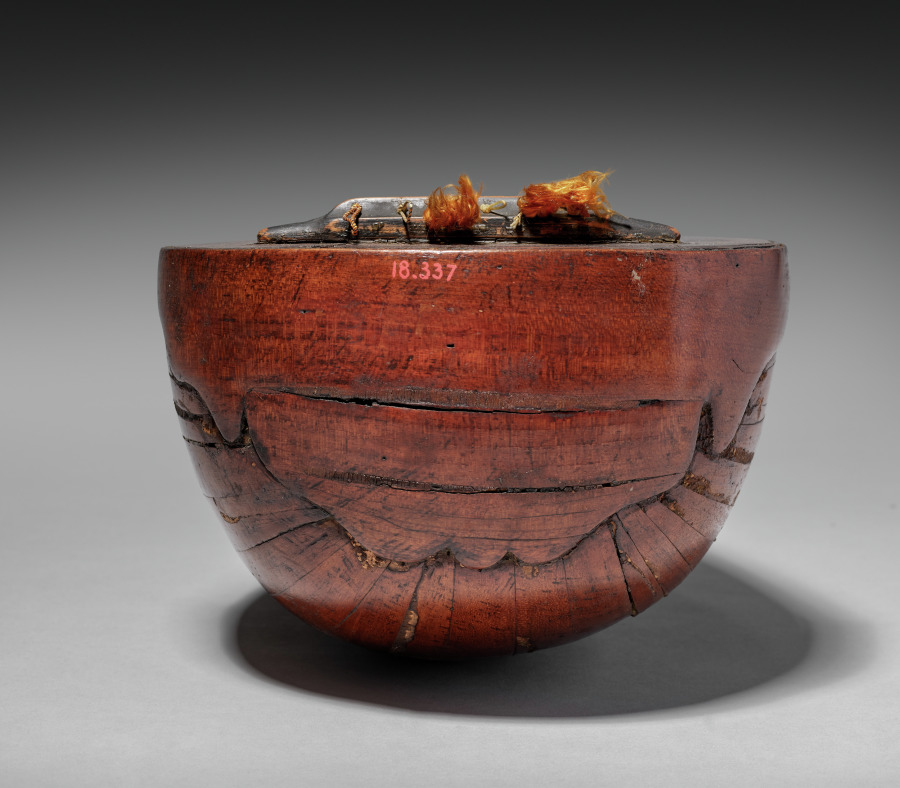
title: Pandurina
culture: Italy, 15th century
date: 1400s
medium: varnished wood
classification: Musical Instrument